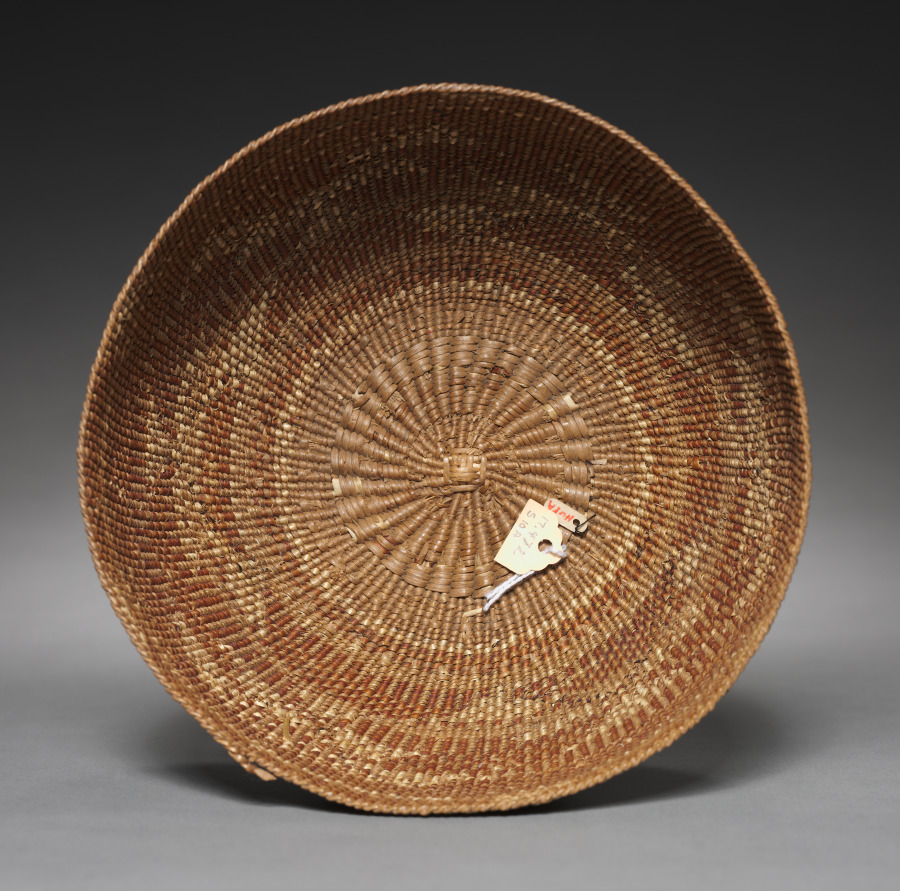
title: Hat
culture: California, late 19th- early 20th century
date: c 1875–1917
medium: plain-twined hazel with decoration in beargrass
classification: Basketry